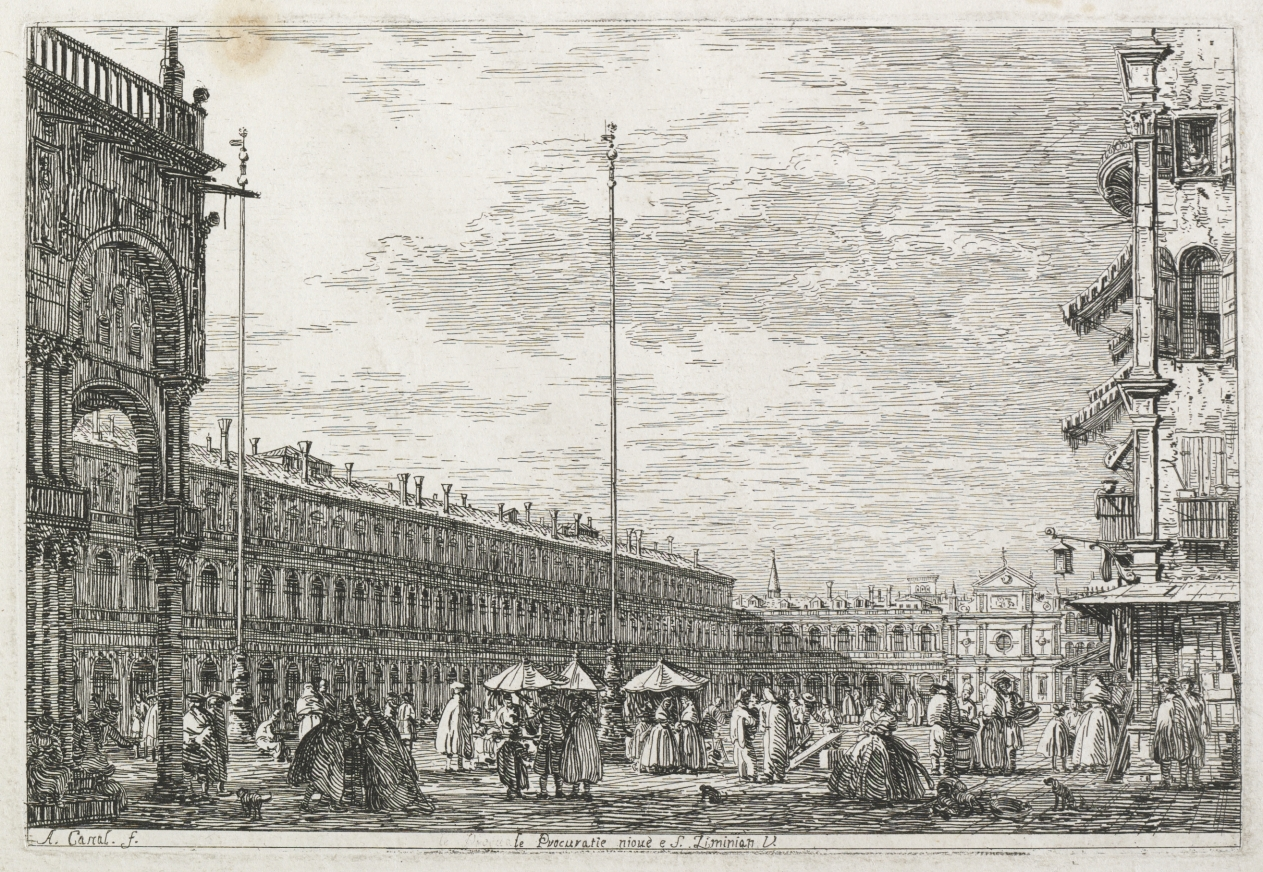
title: Views: The Procurator's Palace and the Church of St. Géminien, Venice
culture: Italy, Venice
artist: Antonio Canaletto (Italian, 1697–1768)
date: 1735–1746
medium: etching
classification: Print